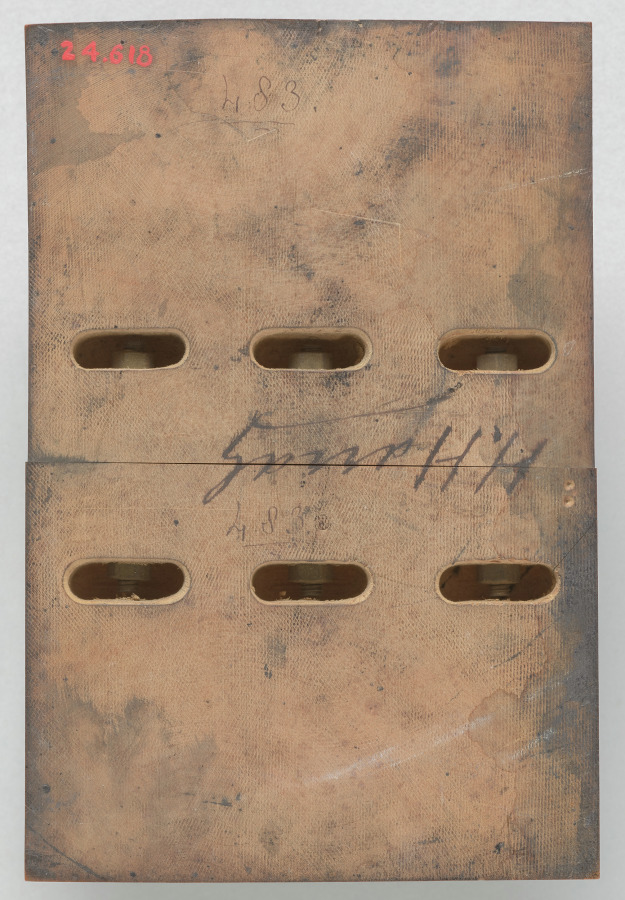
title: Smoking Strictly Prohibited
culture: England, 19th century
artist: Charles Samuel Keene (British, 1823–1891)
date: c. 1867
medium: woodblock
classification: Woodblock